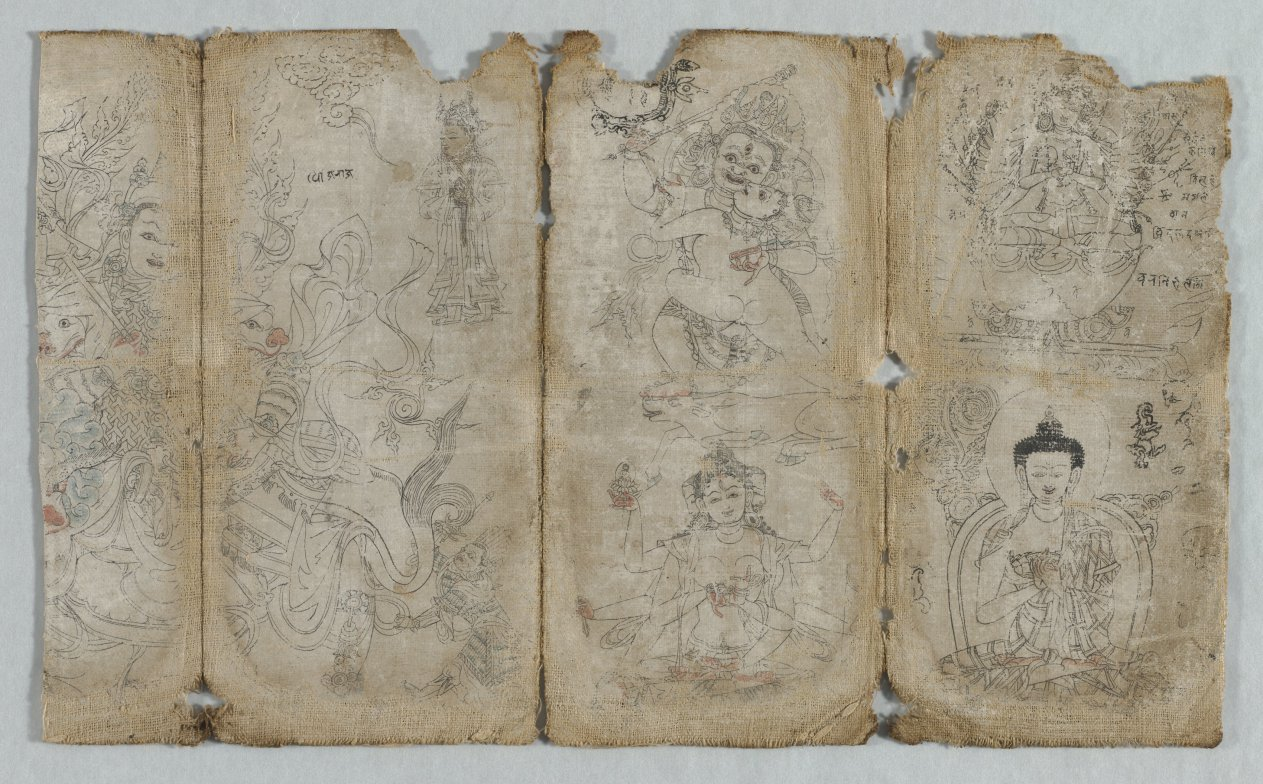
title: Iconographic Drawings: Vaishravana, Yama, Ushnishavijaya, Chunda (?), and Buddha (recto)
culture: Tibet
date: c. 1500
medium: ink and watercolor on cotton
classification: Drawing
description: Tibetan thangka painters referred to sketchbooks with drawings that delineate the iconographies—appearance and identifying attributes—of Buddhist figures. These visual guides were heavily used; very few survive. This rare example shows signs of wear, but the steady line drawings are the work of a master. The largest figure on the left is the guardian king of the north, Vaishravana, god of wealth, and the small figure to the right appears to be a donor in Tibetan dress. The next page to the right has Yama, the guardian king of the south, and the god of death in union with his consort on his buffalo mount. Below them is a goddess of longevity, Ushnishavijaya. At the far right is an 18-armed goddess seated in a skull cup on serpents, below which is a seated Buddha.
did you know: The script notations are in an Indic script, but the line drawings are Tibetan.